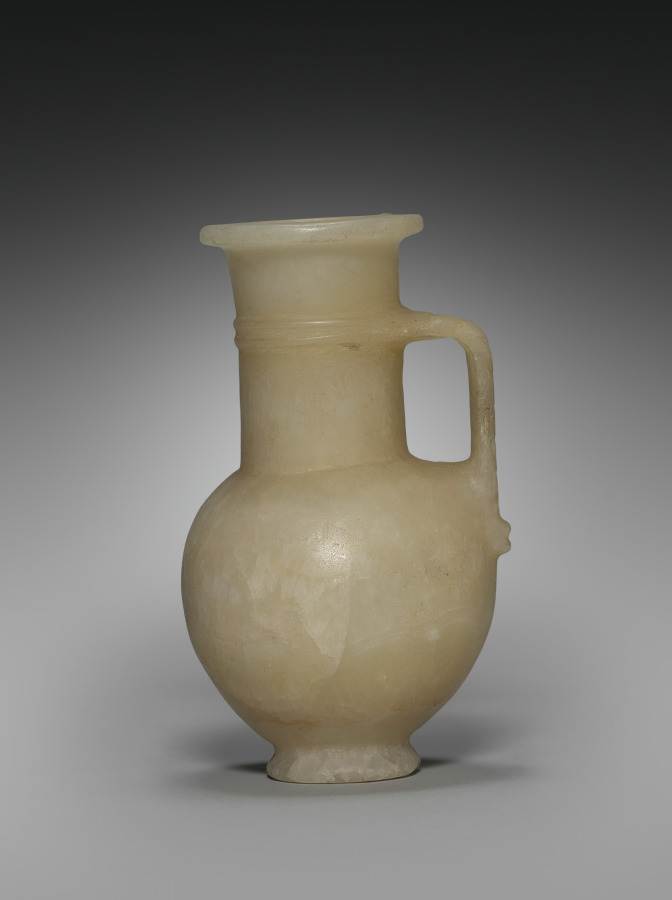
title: Long-Necked Flask with Strap Handle and Lid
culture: Egypt, New Kingdom (1540–1069 BCE), Dynasty 18, reign of Tuthmosis III (1479–1425 BCE)–reign of Amenhotep III (1390–1352 BCE)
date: 1401–1353 BCE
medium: travertine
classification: Vessels